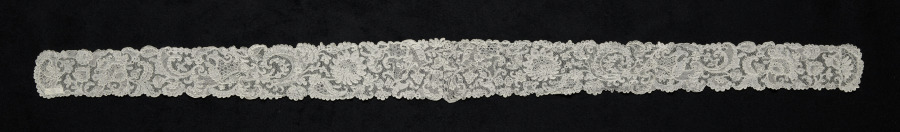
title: Lace Lappet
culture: France, Alençon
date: 1730s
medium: Linen: needle lace (Point d'Alençon)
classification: Lace